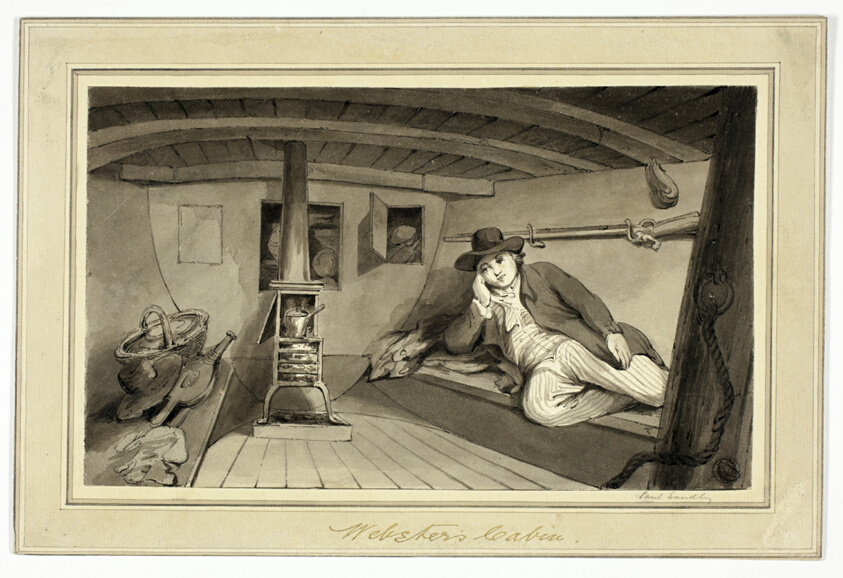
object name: Drawing and Watercolor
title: Webster's Cabin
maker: Isaac Cruikshank (English, 1756-1810); or Paul Sandby (English, 1725-1809); or Robert Isaac Cruikshank (English, 1789-1856)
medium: Pen and black ink, with brush and gray wash, over graphite, on cream wove paper, laid down on cream laid card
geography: England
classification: ink or chalk wash; drawings (visual works); prints and drawing